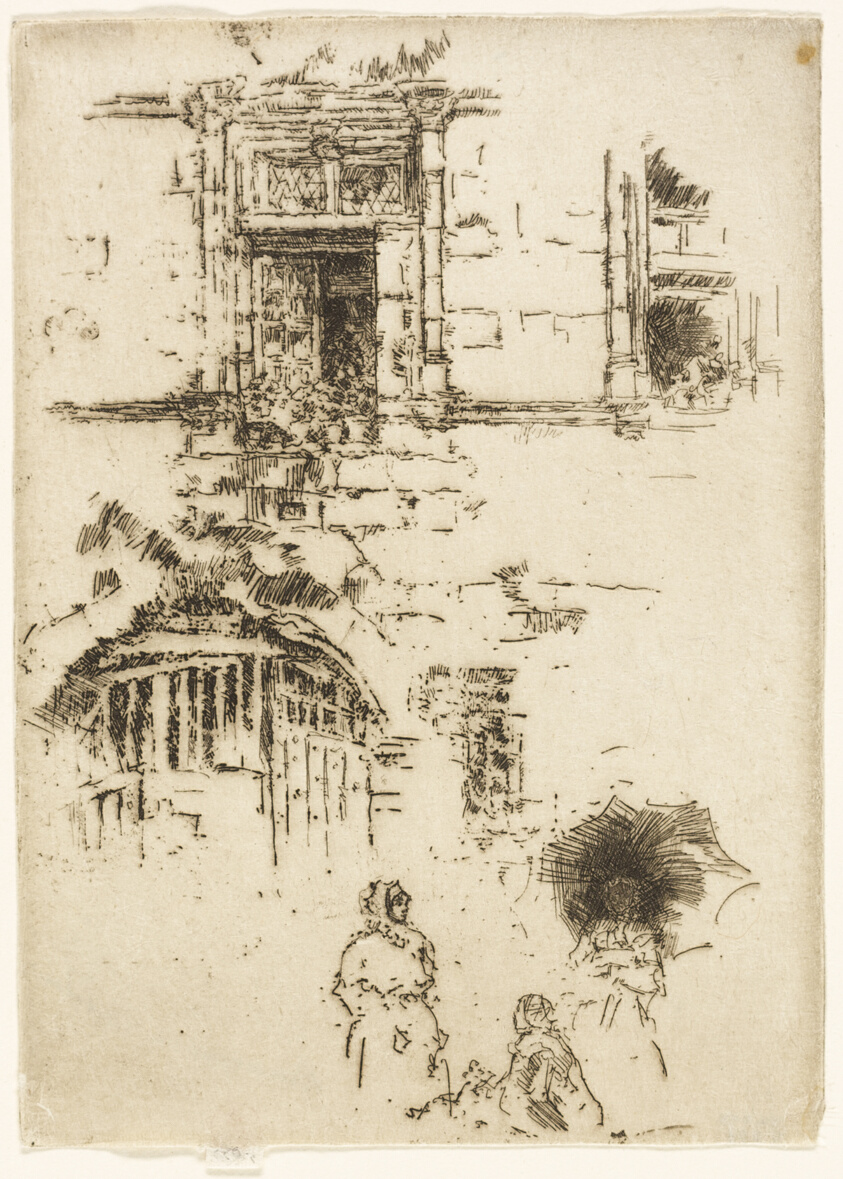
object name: Print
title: Renaissance Window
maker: James McNeill Whistler (American, 1834-1903)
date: 1888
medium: Etching and drypoint with foul biting in dark brown ink on Japanese paper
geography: United States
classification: etching; foul biting; print; prints and drawing; paper; drypoint